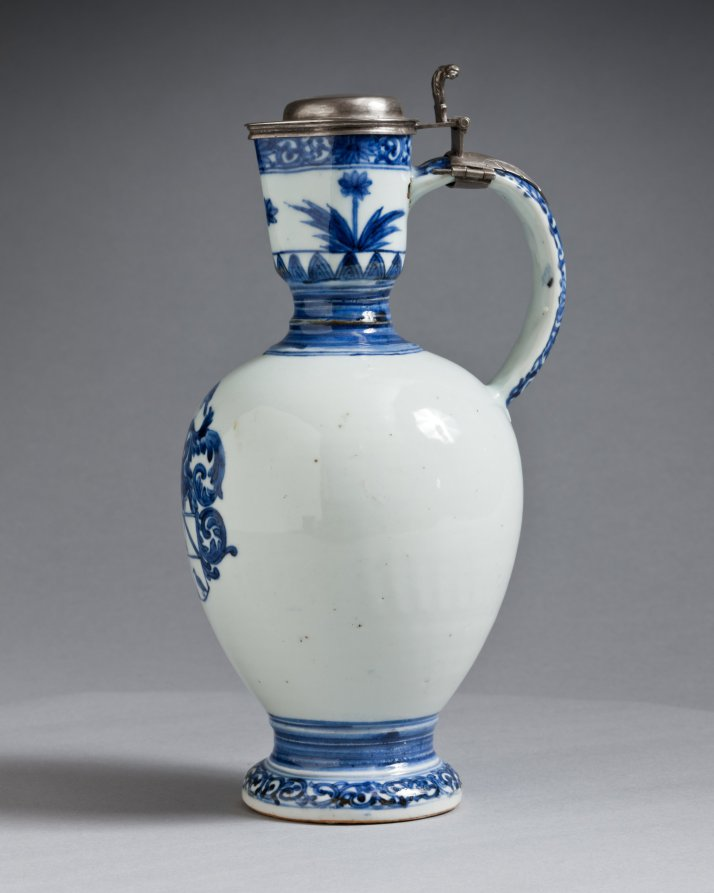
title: Jug with Silver Mounts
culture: Japan, Edo period (1615–1868)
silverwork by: Barent van Leeuwen (Dutch, 1637–1682)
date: c. 1662–76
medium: porcelain with underglaze blue decoration and silver mounts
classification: Ceramic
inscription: [on silver]: town mark for Amsterdam; lion rampant crowned (alloy mark for 0-934 silver); d (date letter for 1666), maker's mark of Barent van Leeuwen.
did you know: The coat of arms on this jug are those of the Valckenier family, active in the Dutch East India Company.